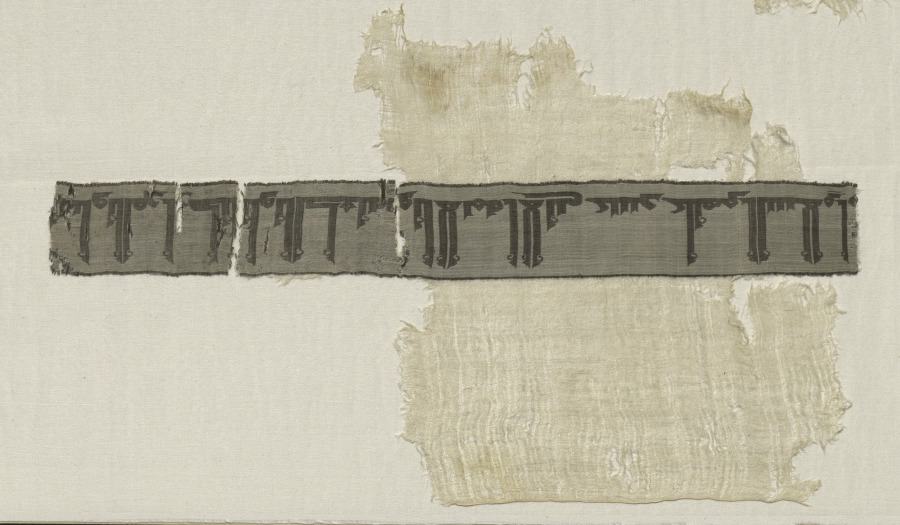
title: Fragment of Inscription Band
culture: Iraq or Iran, in the style of the Buyid period (945–1055)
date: before 1966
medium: compound tabby on tabby ground; silk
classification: Textile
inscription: two parallel inscription bands (1966.135 and 1982.299) with Kufic lettering in dark brown on a lighter brown ground run the warp direction of the cream colored textile with the lettering oriented at right angles to the warp: ". . . sallá Allah 'a[layhi wa-alihi] nabi(an in superscript) wa-bi-al-Qur'an kitab(an in superscript) wa-bi-al-Ka'bah [qiblat(an in superscript)] wa-bi-al-a' immah al-ithná 'ashar 'alayhim al-salam i[mam(an in superscript)]